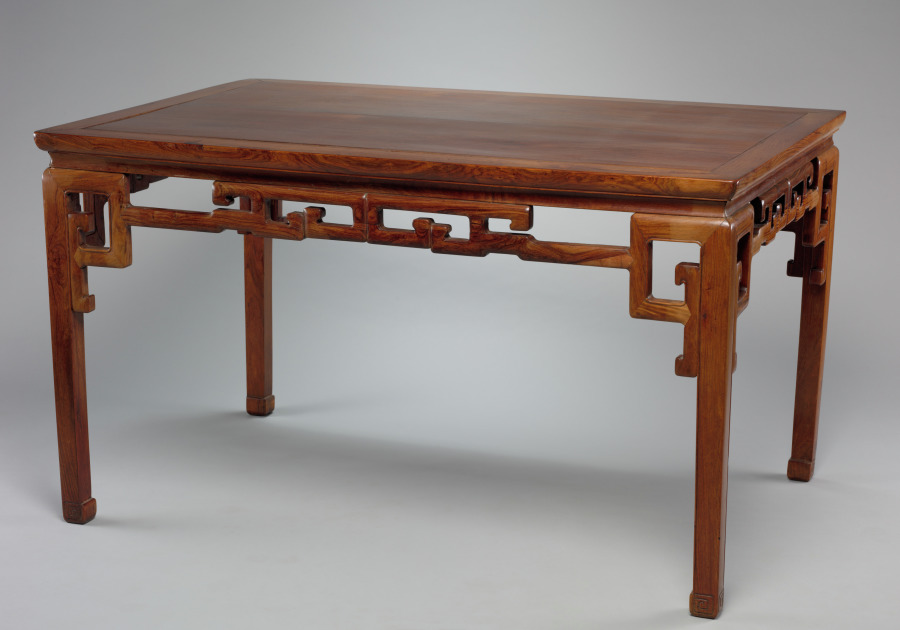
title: Center Table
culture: China, Ming dynasty (1368-1644) - Qing dynasty (1644-1911)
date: 1600s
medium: huali (ptero-carpus indicus [Burmese or East Indian Rosewood])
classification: Furniture and woodwork